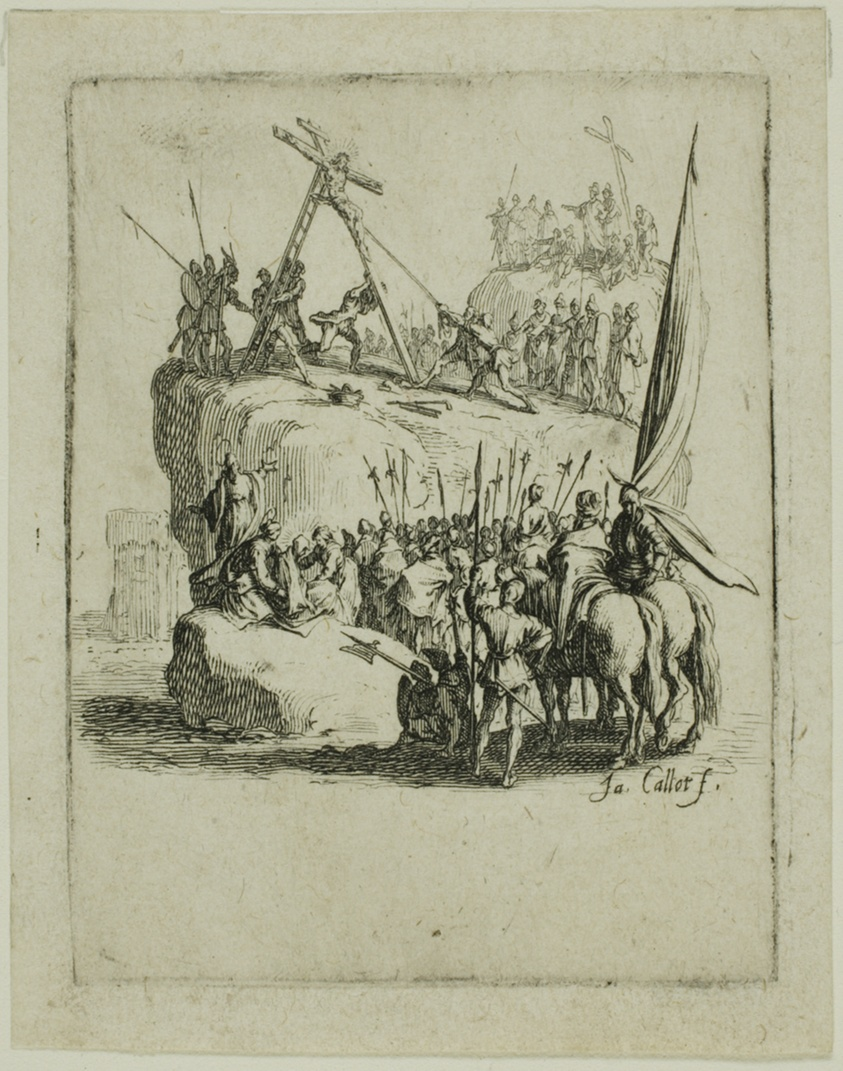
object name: Print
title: The Crucifixion, from The Small Passion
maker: Jacques Callot (French, 1592-1635)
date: 1624/31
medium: Etching on ivory laid paper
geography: France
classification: etching; print; prints and drawing